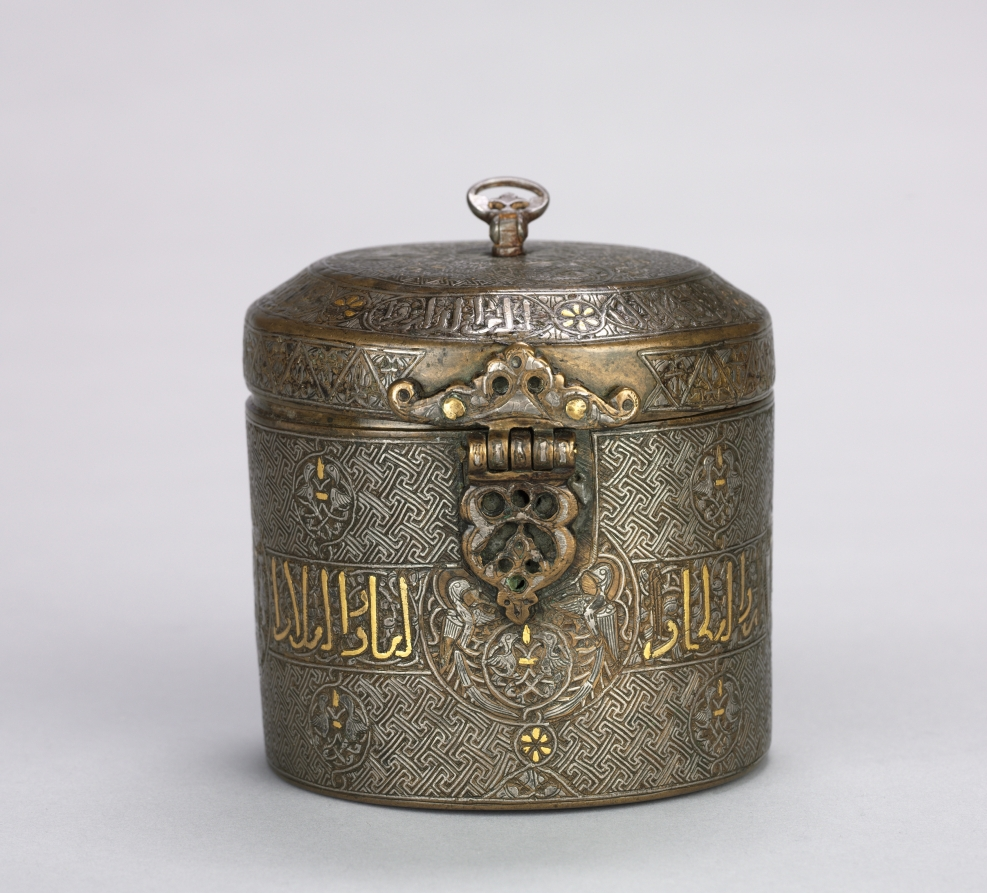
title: Luxury Inlaid Container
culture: Northern Iraq, Ayyubid period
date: c. 1250–1350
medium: sheet brass, inlaid with silver and gold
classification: Metalwork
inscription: Band around body (naskh): "Lasting glory, and safe life, and increasing prosperity, [and] nobility, [and] effective authority"; band around body (naskh): "Brilliance, and nobility, and patience, and modesty, and glory, and long life, and piety, and patience"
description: Metalwork flourished in the 1200s with production centers in Mosul, Damascus, and eastern Anatolia. Along with this container, the nearby ewer and candlestick are examples of the superb pieces produced at this time. Scenes of court life, including banqueting, music, and enthroned figures, decorate the sides and top of the container. The lid is covered in hexagonal swastikas, an ancient solar motif, which is further enhanced by a large sunburst in the center. The calligraphic inscriptions extend wishes for a long life, prosperity, and patience to the owner.